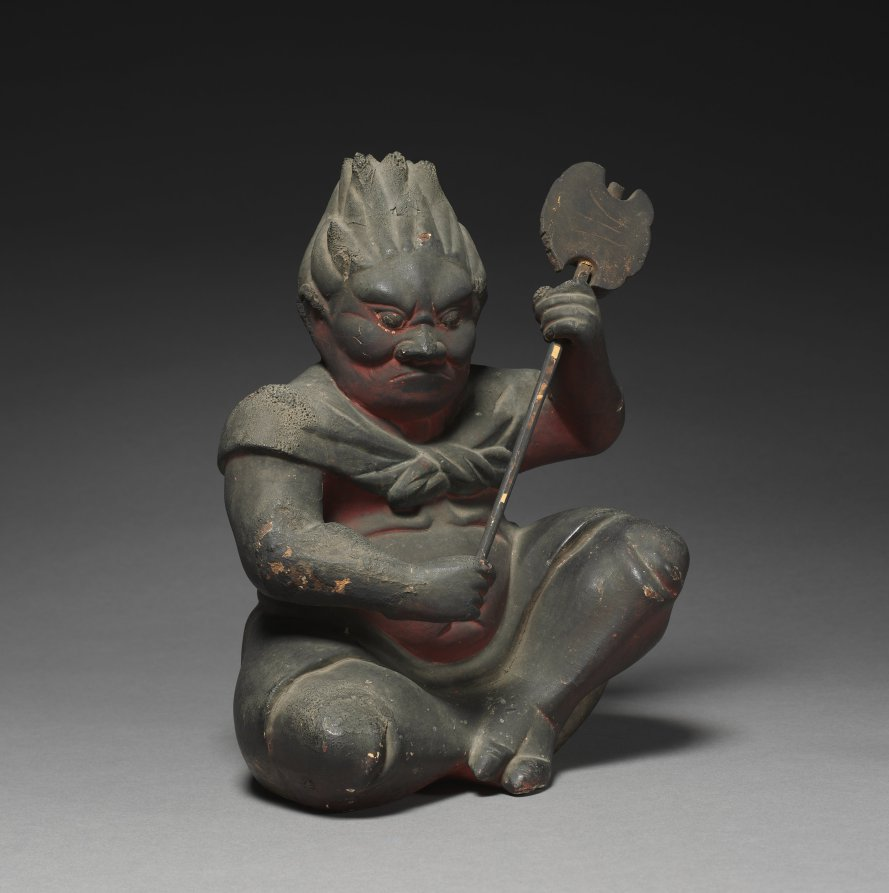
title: Seated Zenki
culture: Japan, Muromachi period (1392–1573)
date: 1400s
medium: wood with pigment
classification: Sculpture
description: The axe-wielding red Zenki, and the vase-holding, bamboo backpack-wearing green Koki are both under the mystical control of the monk, En no Ozunu (legendarily 634–701), also known as En no Gyōja, or “En the Ascetic,” considered to have founded Shugendō, a style of religious practice focused on performing austerities in mountainous settings.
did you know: A popular Japanese comic named Zenki was inspired by the figure seen here wielding a weapon.